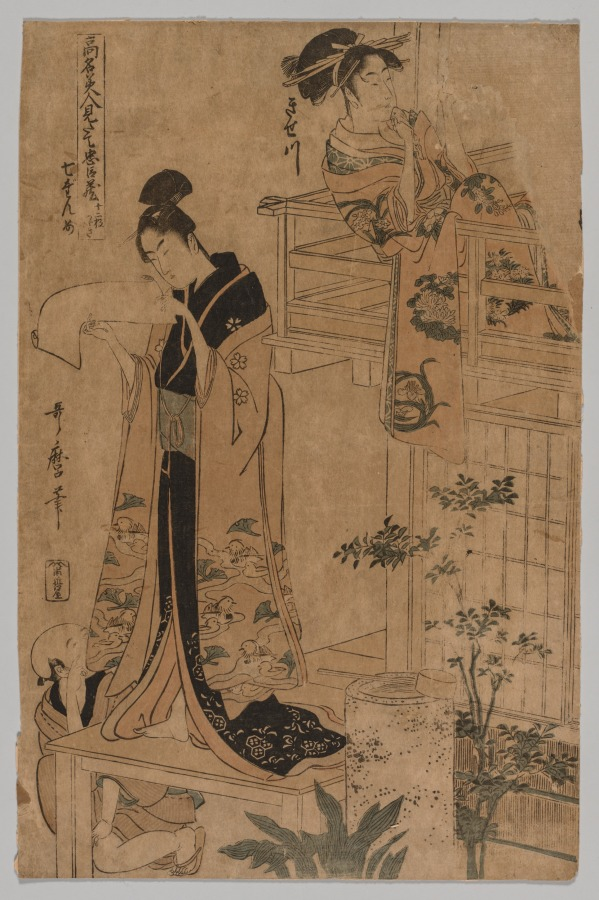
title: Act VII from the series The Storehouse of Loyal Retainers As Portrayed by Famous Beauties in Twelve Leaves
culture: Japan, Edo period (1615–1868)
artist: Kitagawa Utamaro (Japanese, c. 1754–1806)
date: 1794–95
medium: color woodblock print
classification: Print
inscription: Signature: Utamaro fude